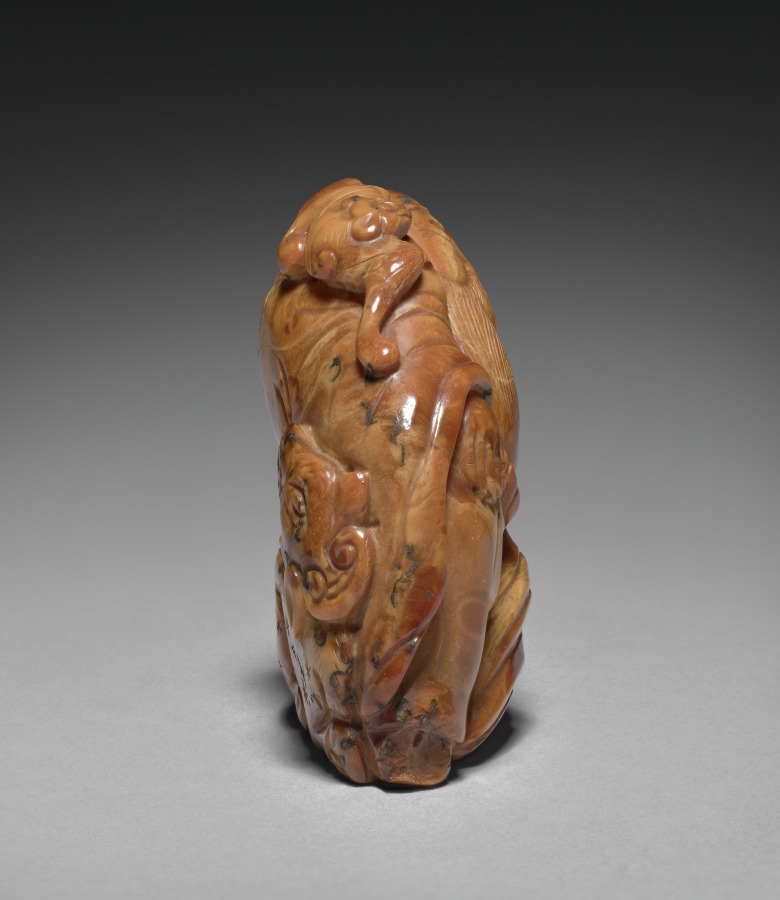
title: Li Taibo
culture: China, Qing dynasty (1644-1911)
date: 1700s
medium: amber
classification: Stone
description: This piece of ochre amber is carved in the round in the form of Li Bai 李白 (701–762), also known as Li Taibai or Li Taibo, 李太白. He was a poet in the golden age of Chinese poetry. Around a thousand poems are attributed to him. Li’s eyes are closed, an arm wrapped around his wine jar, in a drunken sleep. Perched on his shoulder is a bat, considered a lucky symbol as the Chinese word for bat, 蝠 fú, is pronounced the same as “good fortune” 福. Deer, like the one nestled behind Li, traditionally symbolize longevity and prosperity. These auspicious symbols create a bittersweet contrast with the legendary story that Li drowned while drunk when reaching to grasp the moon's reflection in the river.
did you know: Li Bai was one of the Eight Immortals of the Wine Cup, Tang dynasty scholars who enjoyed drinking alcohol.